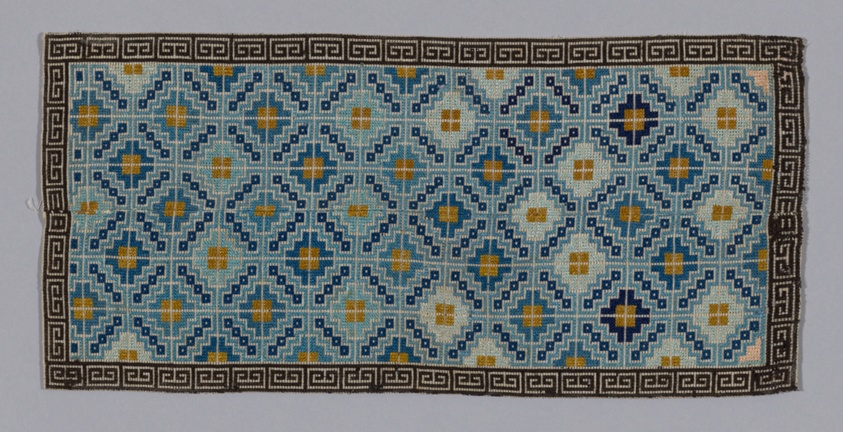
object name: Textile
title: Bands (joined, from Woman's Trousers or Robe)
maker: China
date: 1875/1900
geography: China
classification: textile; needlework - costume; needlework (visual works)